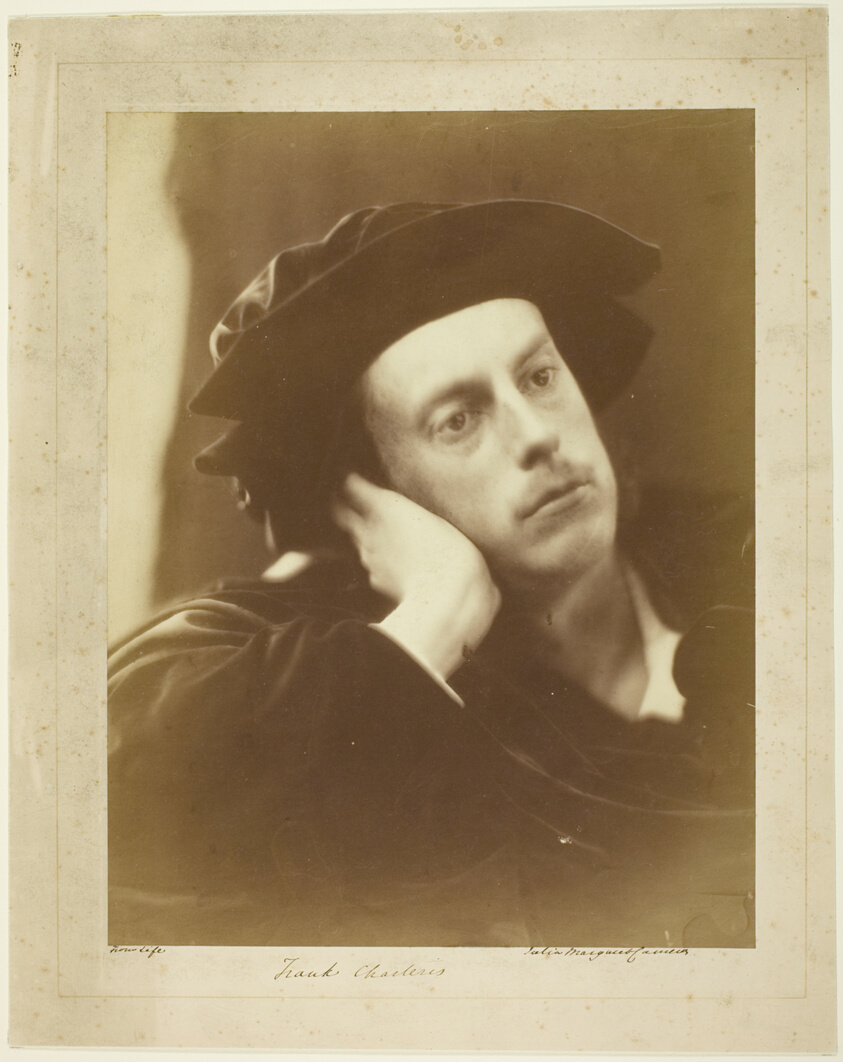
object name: Photograph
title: Portrait of The Hon. Frank Charteris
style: 19th century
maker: Julia Margaret Cameron (English, 1815–1879)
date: 1867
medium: Albumen print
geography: England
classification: albumen silver print; photographic process; photography; photograph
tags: Collected by Hugh Edwards